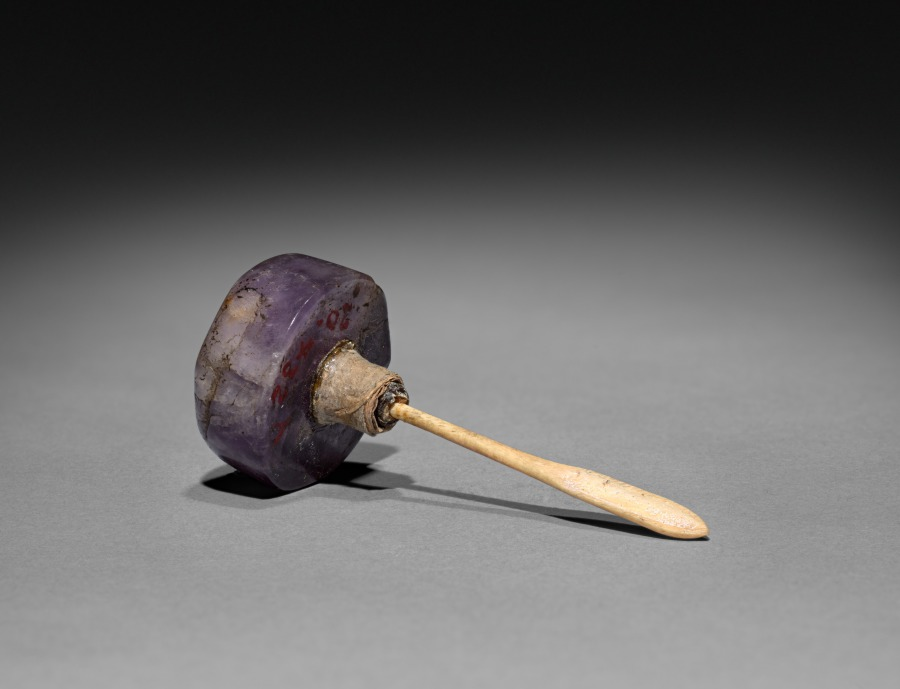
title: Snuff Bottle (stopper)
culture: China, Qing dynasty (1644-1911)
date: 1644–1911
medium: glass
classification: Glass